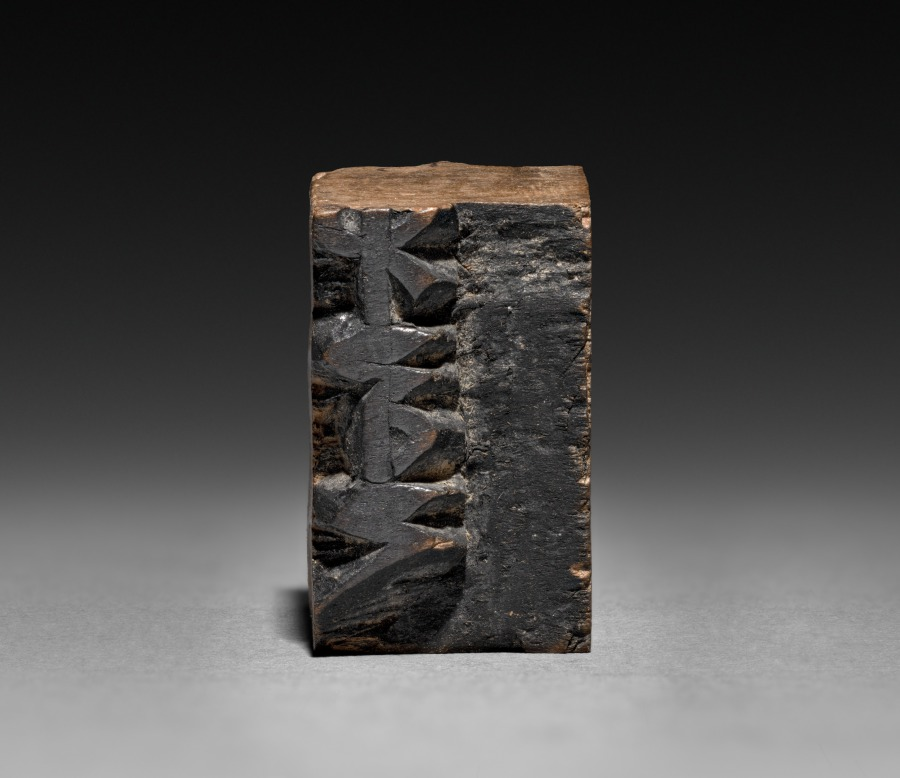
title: Wooden Moveable Type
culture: China, Nigur, 19th century ?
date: probably 1800s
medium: wood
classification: Wood